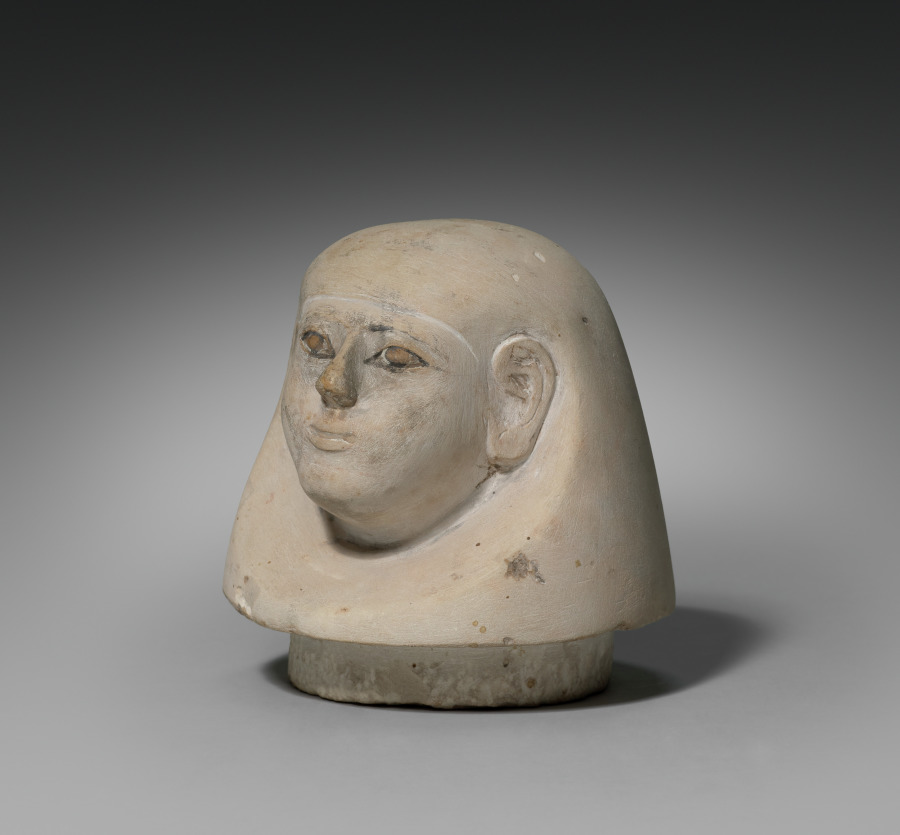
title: Canopic Jar with Lid (lid)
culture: Egypt, New Kingdom (1540–1069 BCE), Dynasty 18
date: 1540–1296 BCE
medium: limestone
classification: Funerary Equipment